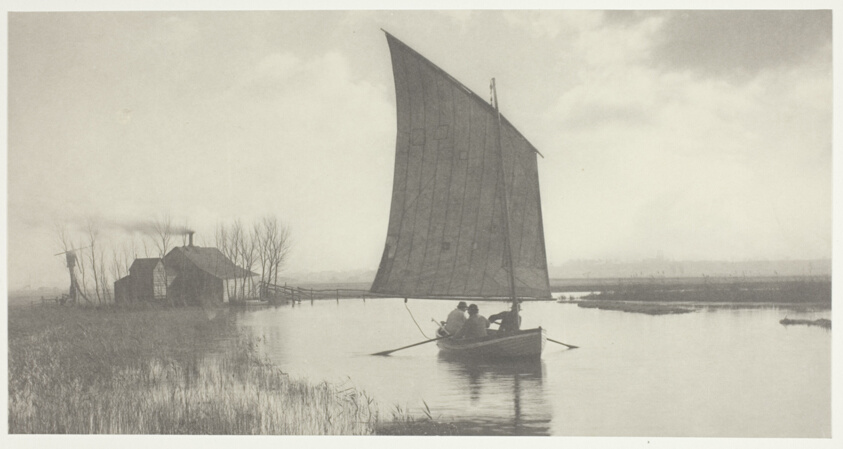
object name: Photograph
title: The Old Order and the New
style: 19th century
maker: Peter Henry Emerson (English, born Cuba, 1856–1936)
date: 1886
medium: Platinum print, pl. XII from the album "Life and Landscape on the Norfolk Broads" (1886)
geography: England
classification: platinum print; photographic process; photography; photograph